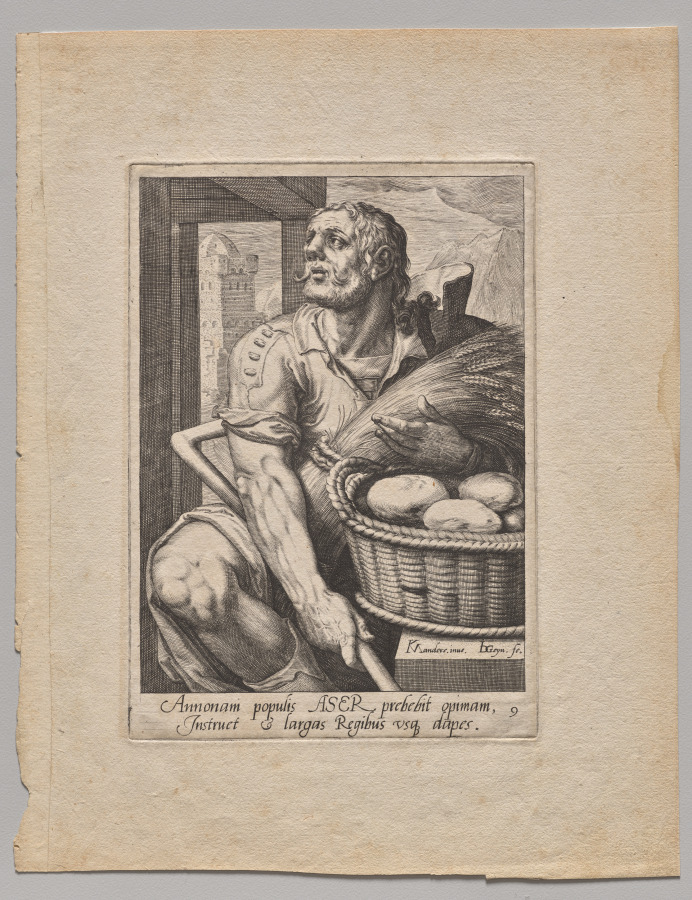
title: Plate 9: Asher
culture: Netherlands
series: The Twelve Sons of Jacob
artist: Jacob de Gheyn II (Netherlandish, 1565–1629)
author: after Karel I van Mander (Netherlandish, 1548–1606)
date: c. 1589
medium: engraving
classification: Print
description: In this print, the biblical figure Asher holds a basket of potatoes and sheaf of wheat, denoting the rich soil and abundant food produced by his tribe. This is one of a series of prints depicting the twelve sons of Jacob, each with an attribute and costume that denotes his character. According to the Old Testament, Jacob blessed each of his twelve sons, prophesizing the destiny of their tribe, and assigning them a parcel of land in Canaan. The print series was made in the Netherlands in the late 16th century, a time of political struggle when Old Testament heroes were popular exemplars of fortitude and patience.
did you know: The castle in the background of this image of Asher, son of Jacob, suggests that food he prepares will be served to kings, as prophesized by his father.